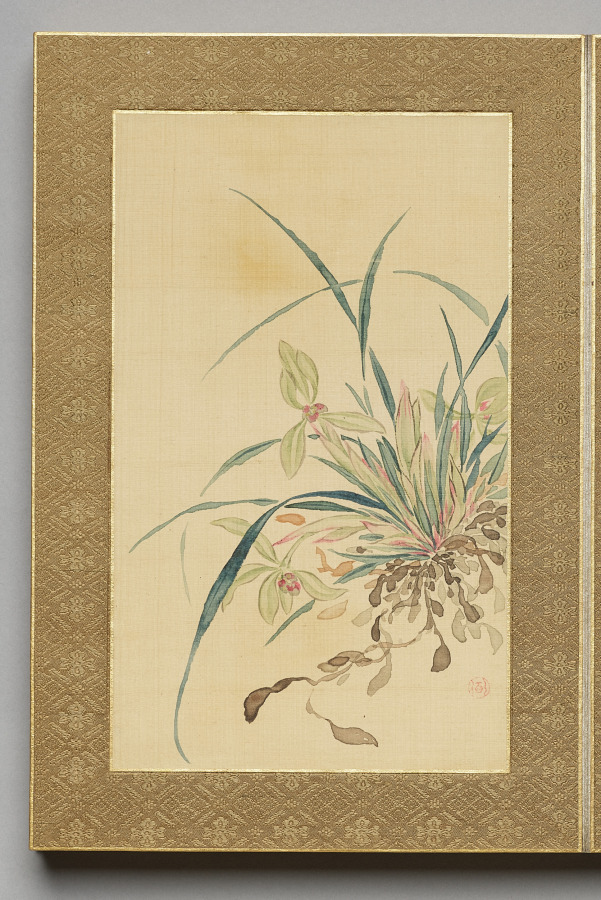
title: Painting from Flowers and Grasses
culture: Japan, Edo period (1615–1868)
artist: Tsubaki Chinzan (Japanese, 1801–1854)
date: 1841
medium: album; ink and color on silk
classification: Painting